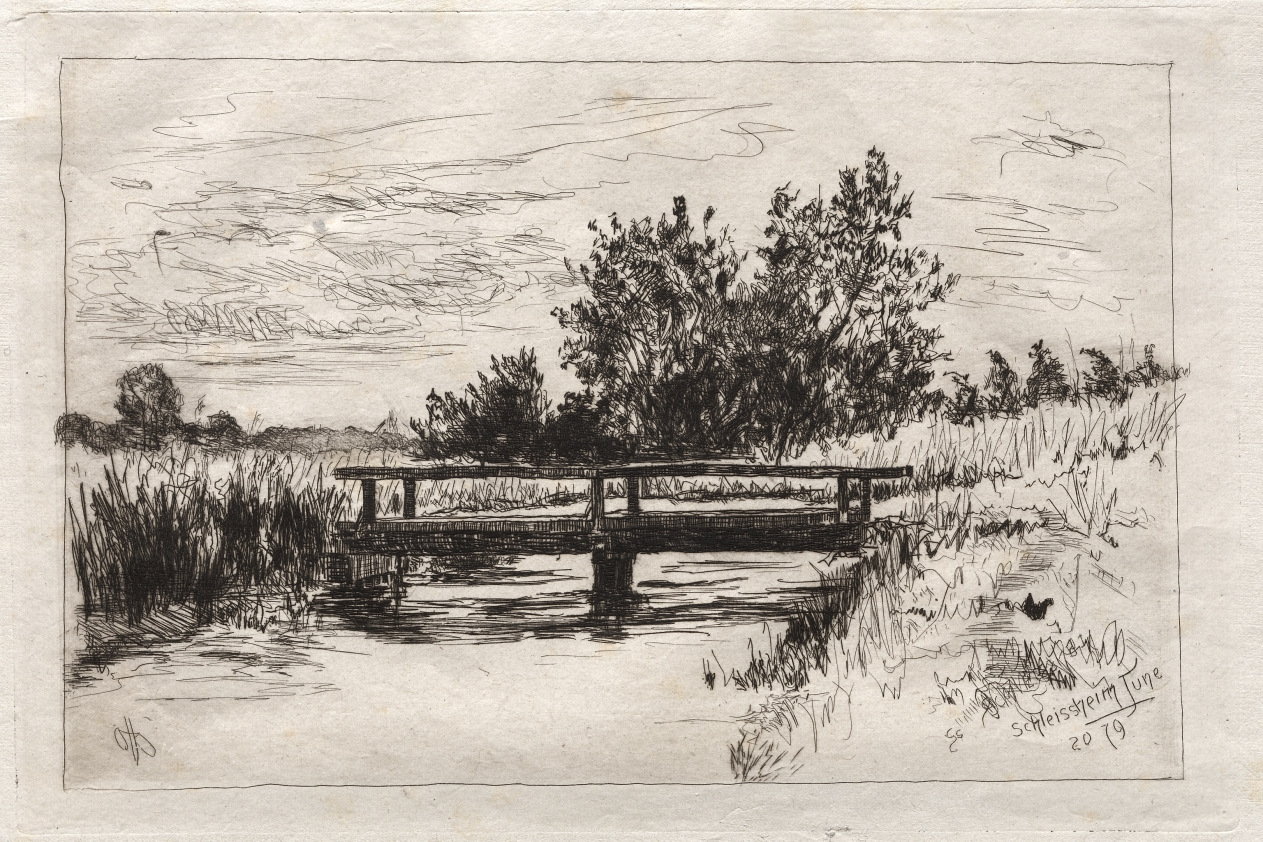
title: Bridge, Schleissheim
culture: America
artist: Otto H. Bacher (American, 1856–1909)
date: 1879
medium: etching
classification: Print